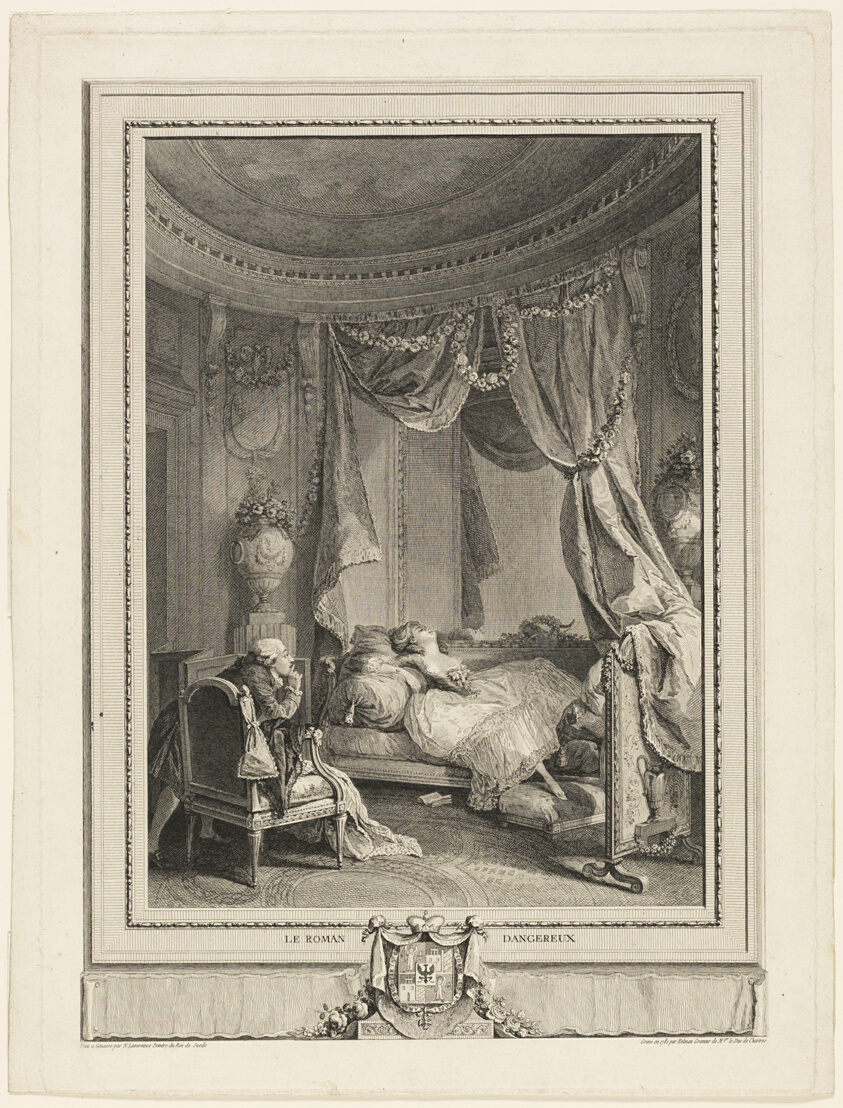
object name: Print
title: The Dangerous Novel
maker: Isidor-Stanislas Helman (French, 1743-1806 or 1809); after Nicolas Lavreince (Swedish, 1737-1807)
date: 1781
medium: Etching on paper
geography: France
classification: etching; print; prints and drawing